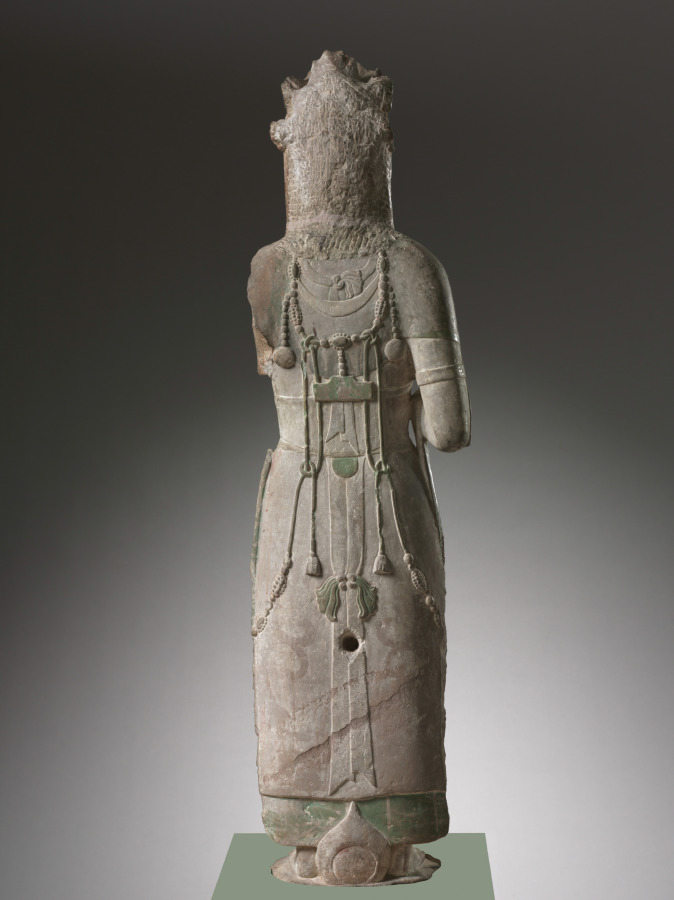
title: Bodhisattva Guanyin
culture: China, late Northern Qi (550–577) or early Sui dynasty (581–618)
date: late 500s–early 600s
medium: sandstone with polychromy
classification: Sculpture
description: The artistic excellence of this bodhisattva is further reinforced by comparable outstanding Chinese Buddhist sculptures excavated at Qingzhou in Shandong Province in 1996—one of the most sensational and significant archaeological finds of the 1900s. Like related types among the Qingzhou finds, this statute has a gently smiling face and meticulous detailing of splendid jewelry. A noticeable difference, however, is the unique yingluo 瓔珞 (mukt hara) worn by the bodhisattva for personal adornment. The somewhat bizarre but imaginative combination of a string of jewels with grotesque animal masks, flying apsara, jade pendants, dragons, and metal ornaments was probably a regional decorative style of Shanxi Province.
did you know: The carved and painted back suggest that the bodhisattva was originally displayed where it could be viewed in the round.